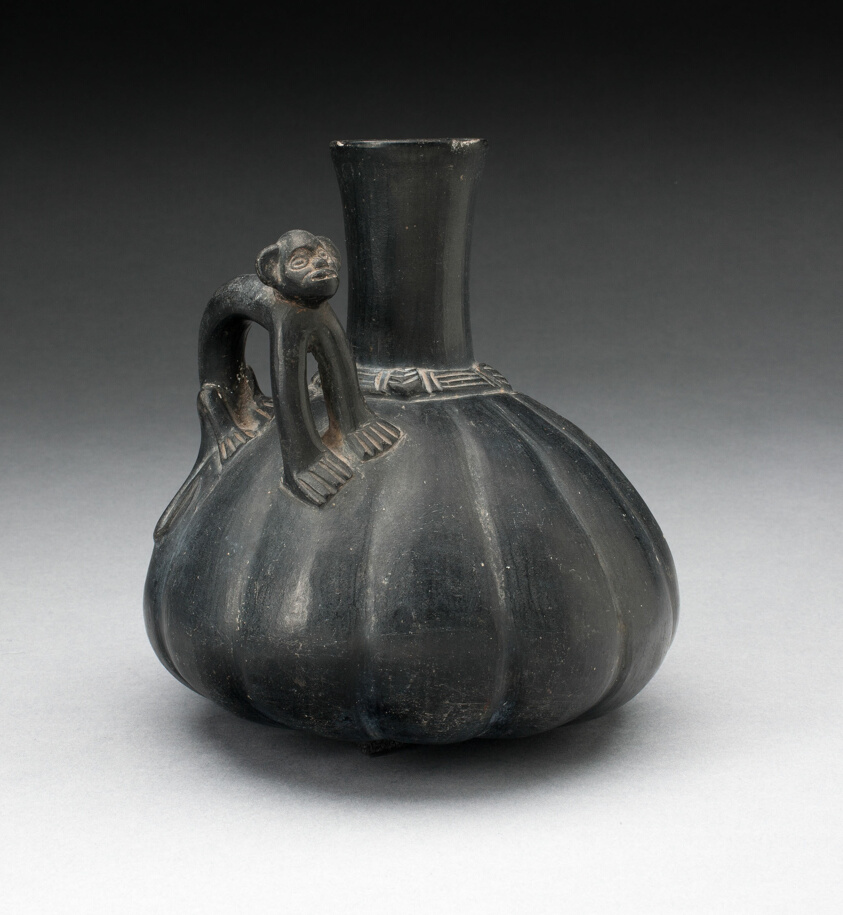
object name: Vessel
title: Gourd-Shaped Blackware Jar with Modeled Monkey Handle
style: chimú, late intermediate period, Pre-Columbian, americas, inca, Arts of the Americas, andean, andes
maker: Possibly Lambayeque or Inca-Chimu; North coast, Peru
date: 1000–1450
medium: Ceramic and pigment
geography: Peruvian North Coast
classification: earthenware; ceramics; vessel; art of the americas